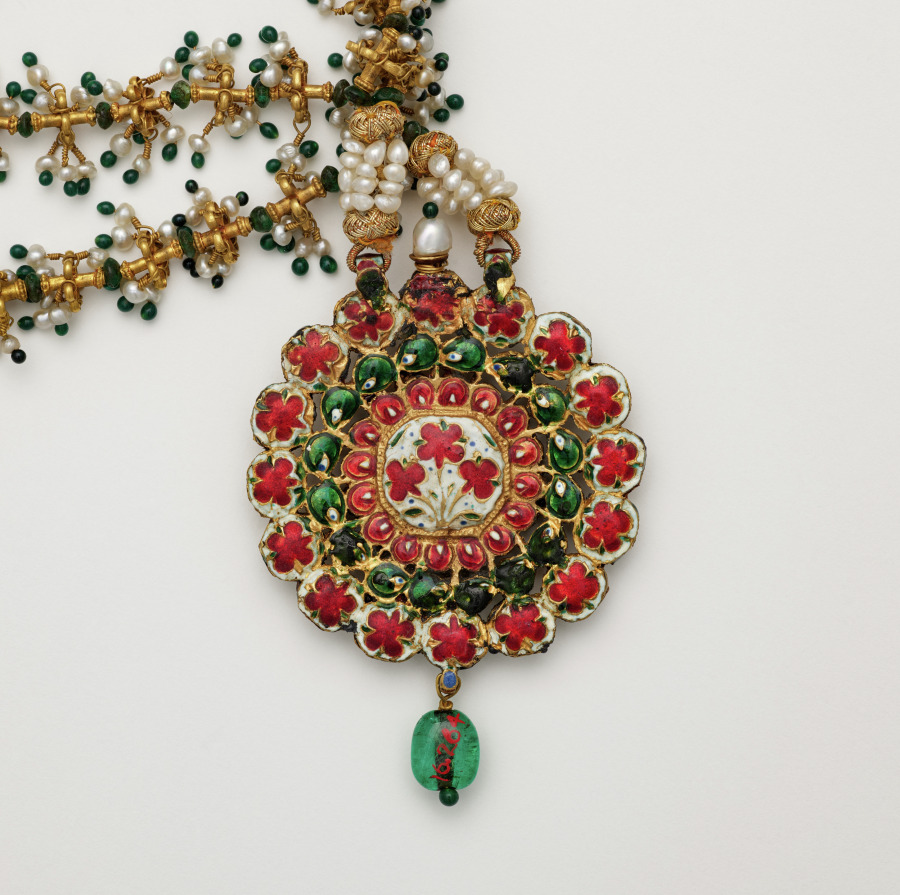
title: Necklace and Pendant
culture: India, Delhi in the Punjab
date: before 1916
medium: gold, enamel and gems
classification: Jewelry